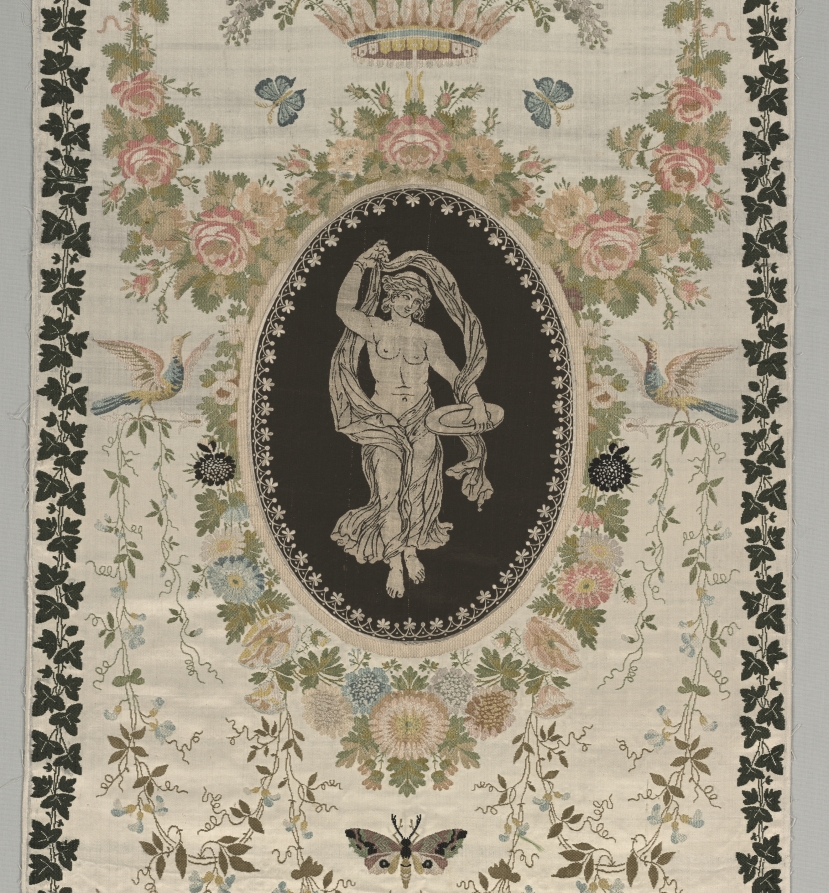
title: Wall Covering with Classical Figure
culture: France, late 18th-early 19th Century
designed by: Philippe de Lasalle (French, 1723–1805)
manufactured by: Camille Pernon & Cie (French)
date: late 1700s - early 1800s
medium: Silk: llampas (satin weave and plain weave variant), brocaded, appliquéd, embroidered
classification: Textile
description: France developed a thriving silk industry in Lyon with the goal of becoming the fashion center of Europe. Employment soared to some 20,000 workers by the time of the French Revolution in 1789. Designs changed annually, colors established new fashions, and spectacular silks were produced during the late 1700s. Philippe de Lasalle, trained as a painter by François Boucher, became the celebrated chief textile designer for Camille Pernon & Cie, purveyors to King Louis XVI (reigned 1785-90). Lasalle’s floral style with large and balanced designs, enhanced here with a fashionable classical figure, displays his preference for lighter forms without the opulent gold thread of earlier brocaded silks.